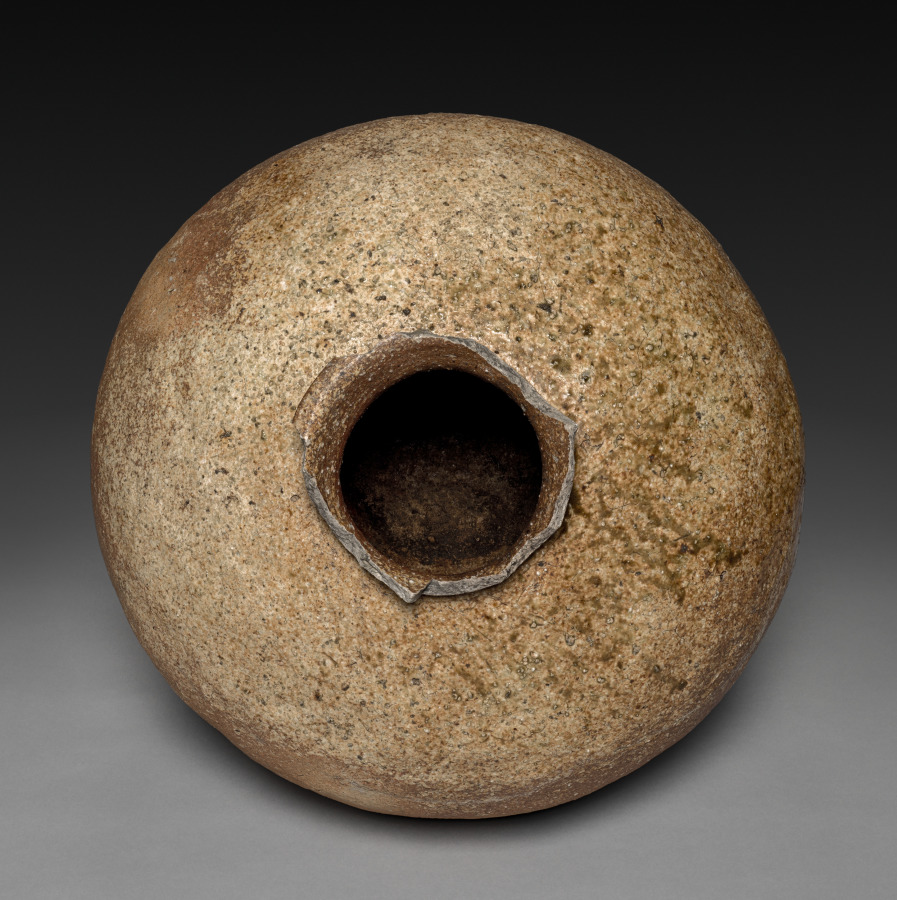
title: Storage Jar (Tsubo)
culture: Japan, Muromachi period (1392–1573)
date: 1400s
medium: stoneware with natural ash glaze (Shigaraki ware)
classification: Ceramic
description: This bulbous clay jar, with its expansive, dry orange-brown surface, white dots of feldspathic stone, and spidery crazing marks epitomizes one type of medieval ware from Shigaraki. This region east of Kyoto and north of the older cultural and religious center of Nara has long been known as a source of superior clay material. Shigaraki storage jars were crafted for strength and durability. The vessel's slightly lopsided shape shows precisely where its three lower clay sections connect with one another. The "stubble" on the upper shoulder sections is highlighted by dripping rivulets of dull-green ash glaze in one small area on the broken neck. The same natural glaze runs over the slope of the shoulder and also appears as a large splash of thin, glossy olive green where the shoulder joins the upper body.